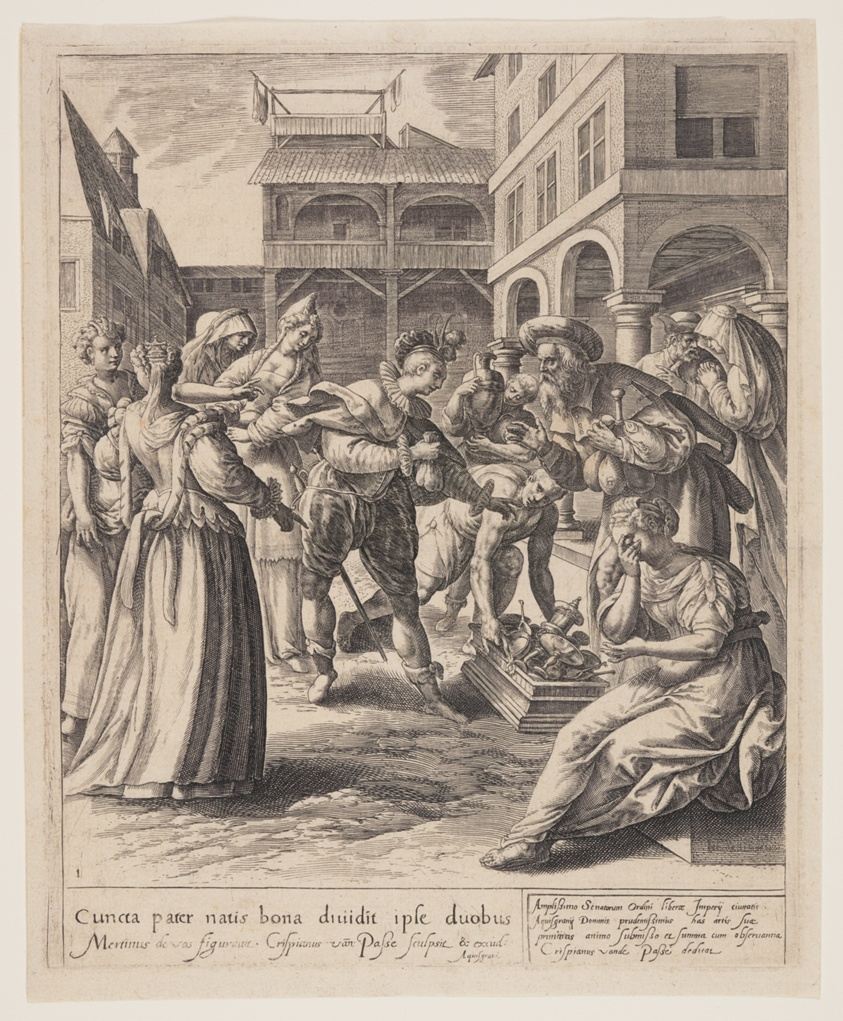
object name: Print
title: The Son Receiving His Heritage, from The Parable of the Prodigal Son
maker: Crispijn van de Passe I (Dutch, c. 1565–1637); after Maarten de Vos (Flemish, 1532–1603)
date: c. 1600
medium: Engraving on laid paper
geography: Netherlands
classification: engraving; paper; print; prints and drawing